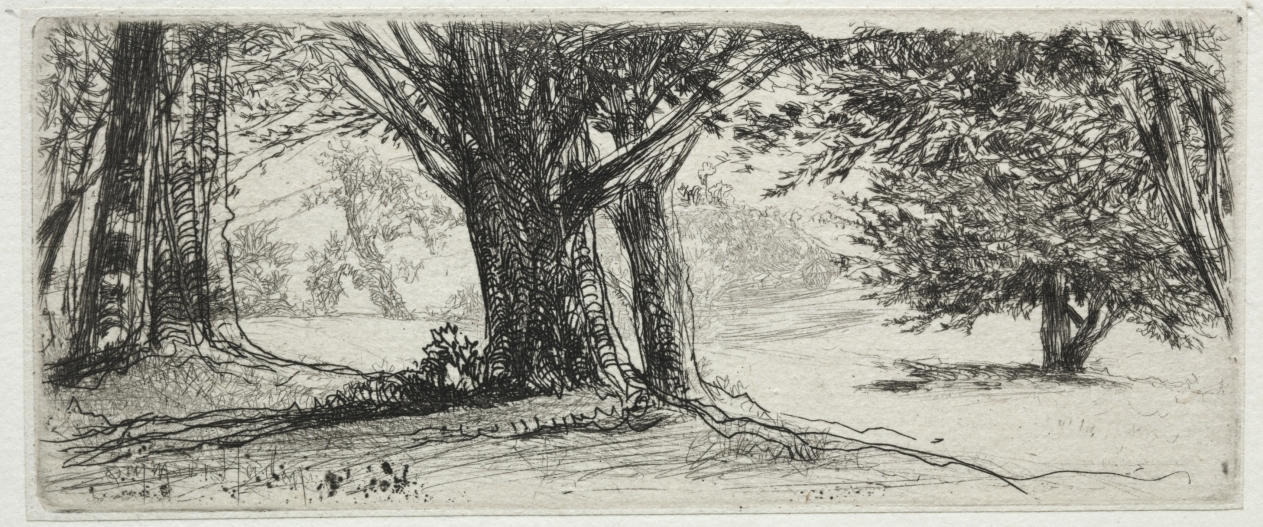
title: The Holly Field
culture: England, 19th century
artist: Francis Seymour Haden (British, 1818–1910)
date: 1860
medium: etching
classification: Print